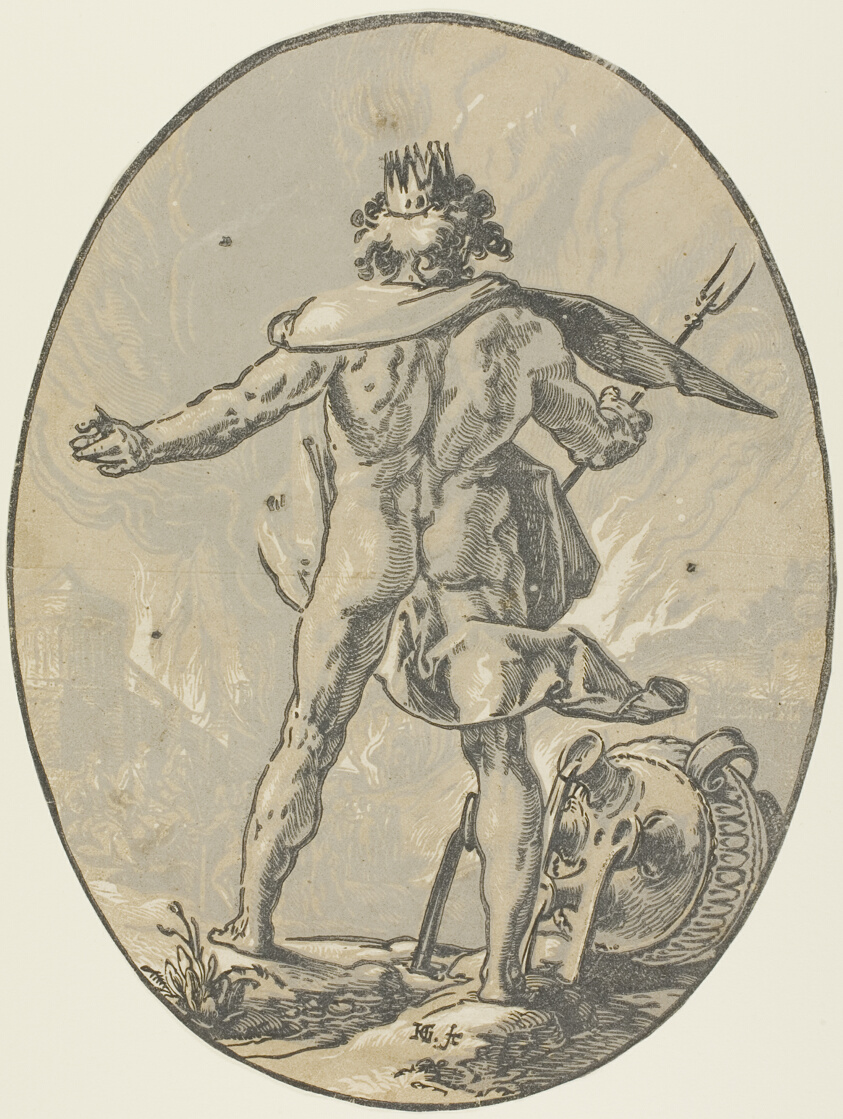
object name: Print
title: Pluto, plate four from Demogorgon and the Deities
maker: Hendrick Goltzius (Dutch, 1558-1617)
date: c. 1588–90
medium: Chiaroscuro woodcut in black and two shades of gray on paper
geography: Netherlands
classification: woodcut; print; prints and drawing